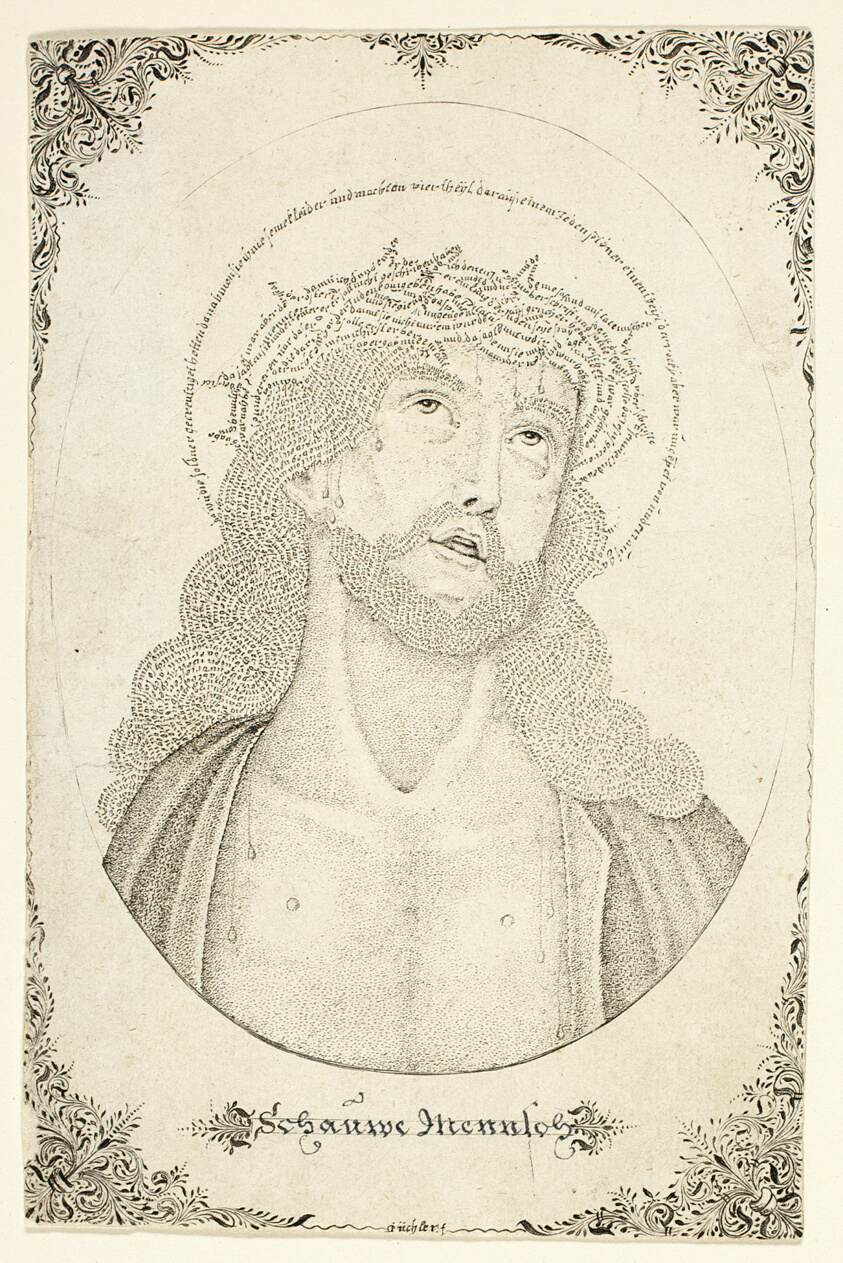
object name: Print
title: Man of Sorrows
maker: Johann Michael Püchler (German, active 1679-1709)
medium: Engraving in black on ivory laid paper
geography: Germany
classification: engraving; print; prints and drawing